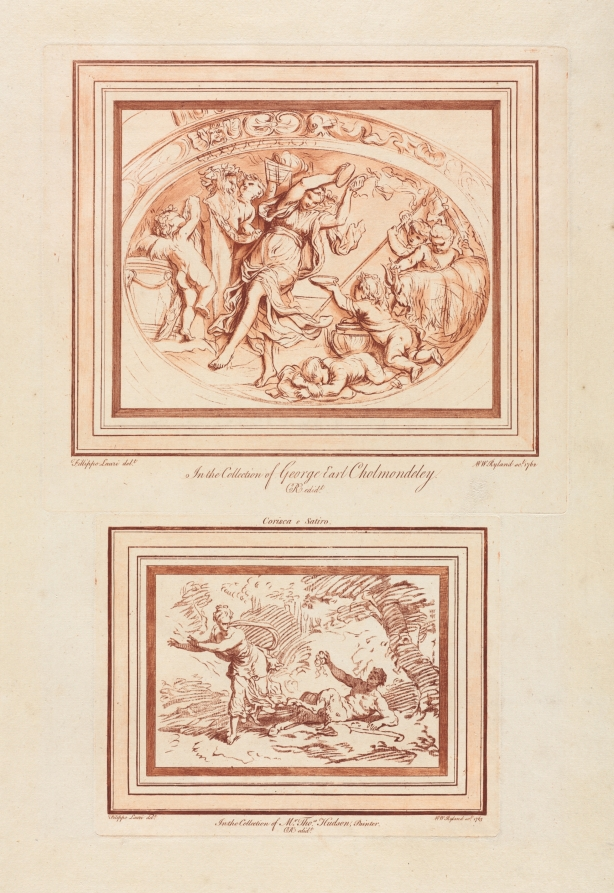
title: Corsica e Satiro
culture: England, 18th century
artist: William Ryland (British, 1732–1783)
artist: after Filippo Lauri (Italian, 1623–1694)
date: 1762–1763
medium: chalk-manner etching and engraving printed in red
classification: Print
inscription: inscribed, lower margin, in plate: In the Collection of George Earl Cholmondeley. / CR edidt.; inscribed, lower margin, in plate: In the Collection of Mr. Thos. Hudson, Painter. / CR edidt.